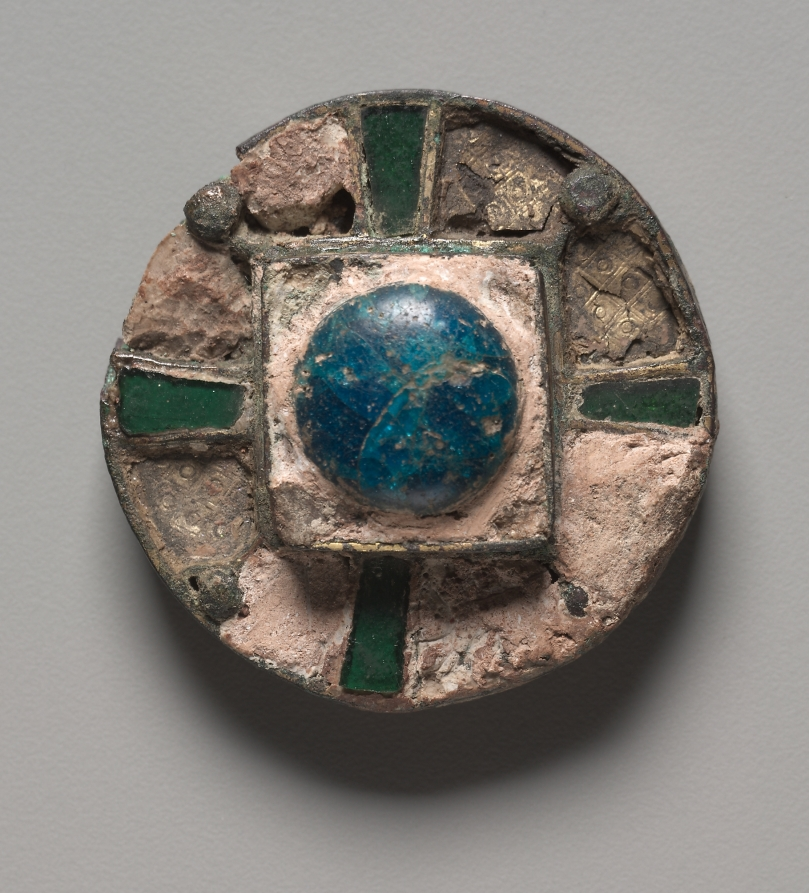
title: Disk Ornament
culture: Ostrogothic?, Migration period, 6th century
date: 500s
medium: bronze, gold foil, traces of gilding and glass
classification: Jewelry